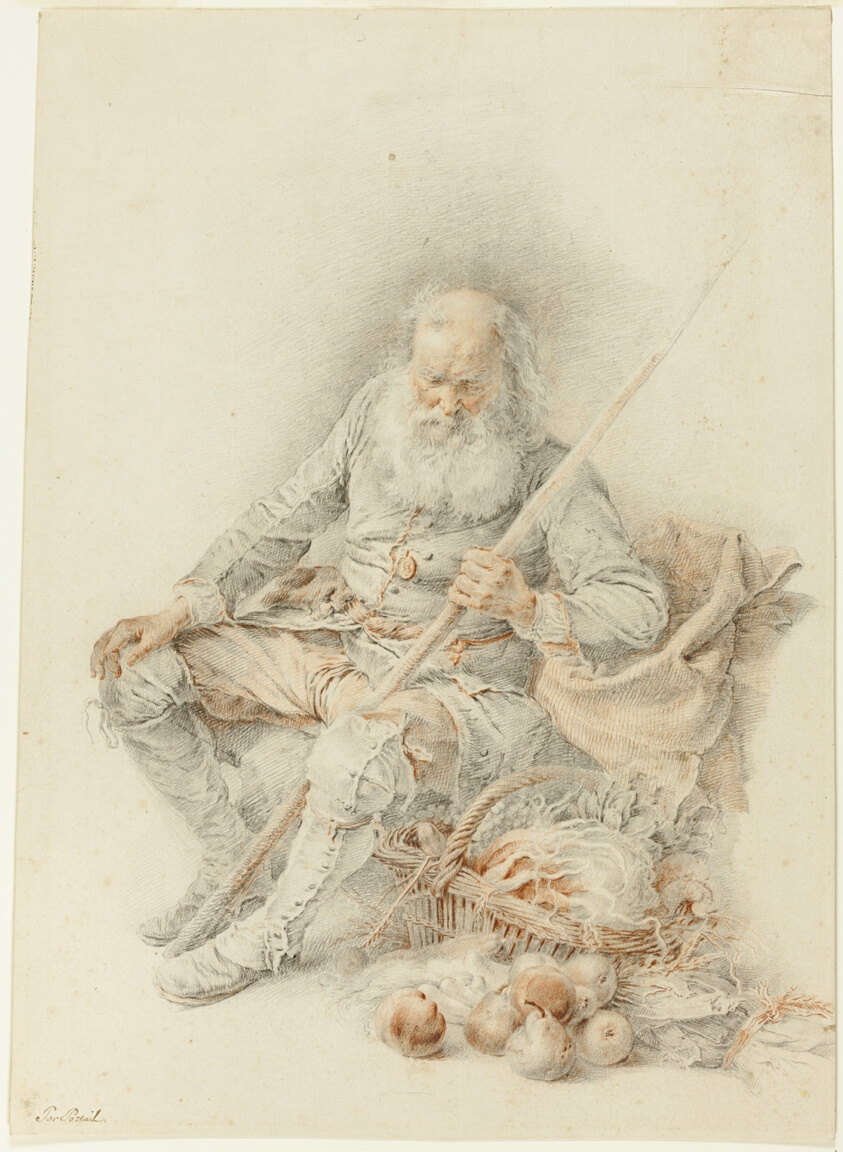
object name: Drawing and Watercolor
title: Old Man with a Basket of Fruit and Vegetables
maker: Jacques André Portail (French, 1695-1759)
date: 18th century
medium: Black chalk and red chalk, with touches of graphite, on buff laid paper, laid down on cream laid paper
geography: France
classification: chalk; drawings (visual works); prints and drawing